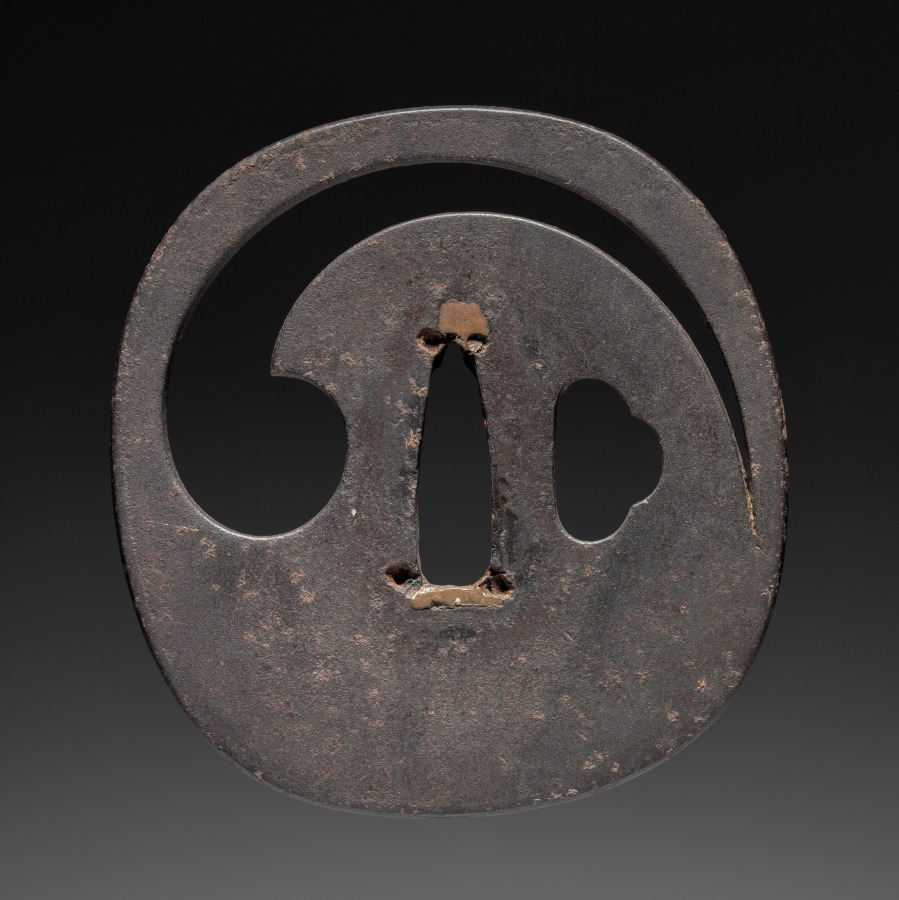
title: Sword Guard (Tsuba)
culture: Japan, possibly Edo period (1615-1868)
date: c. 1615–1868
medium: iron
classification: Arms and Armor